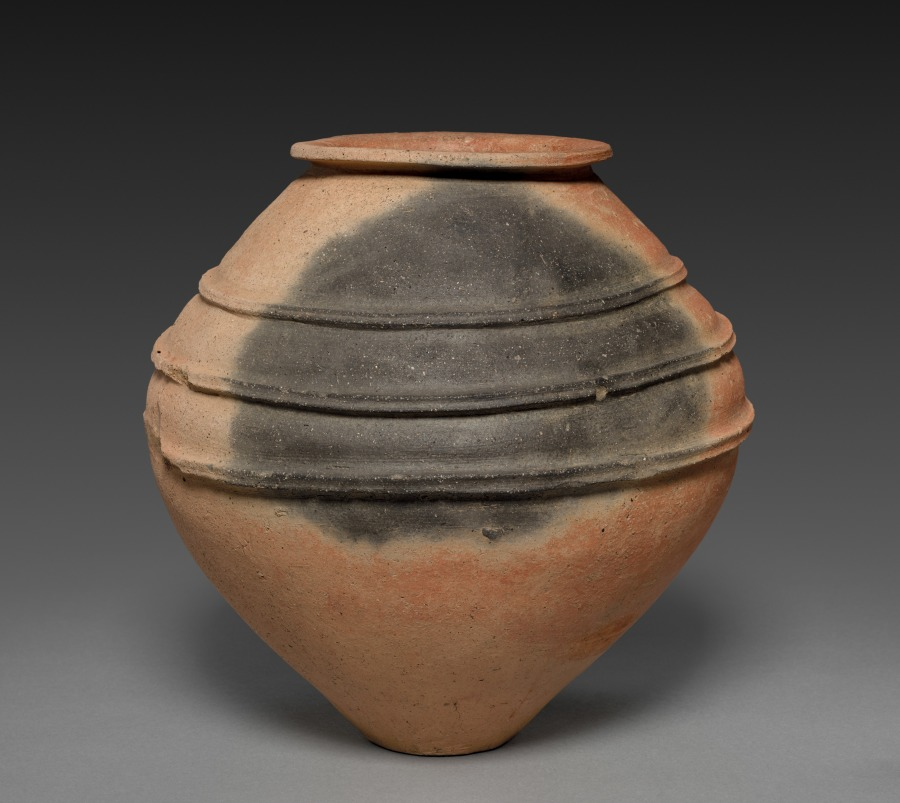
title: Jar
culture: Japan, Yayoi period (c. 300 BCE–300 CE)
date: c. 100 BCE–100 CE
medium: burnished earthenware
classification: Ceramic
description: The banding around this jar’s upper portion is an unusual feature for Yayoi pottery, which usually has a flat surface. It was likely made in western Japan, between Seto in Aichi prefecture and Kyushu, the southernmost main island. It is not believed to be a cooking vessel, but may have been used for storage. The ash spots occurred naturally during firing.